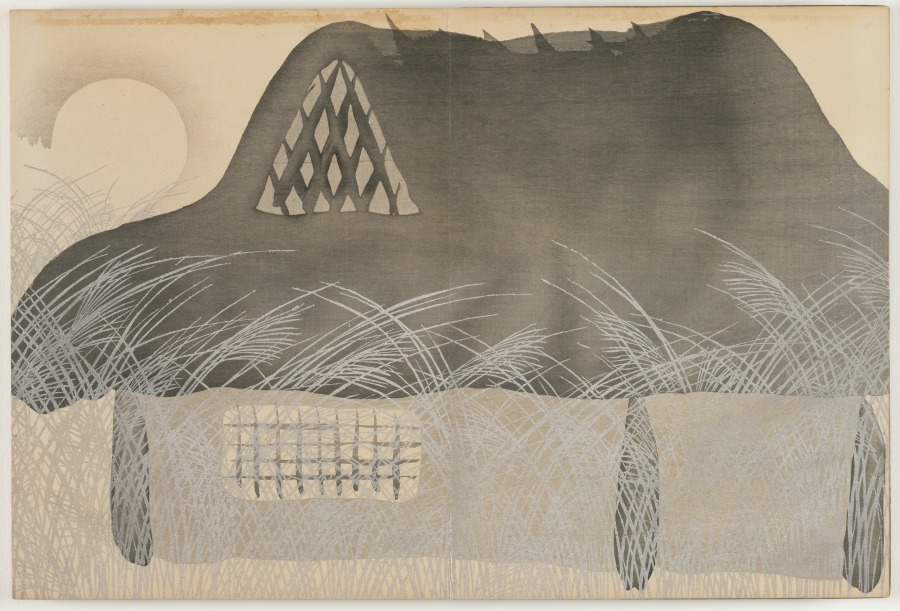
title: Flowers of a Hundred Worlds (Momoyogusa): Autumn Night (Aki no yoru)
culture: Japan, Meiji period (1868–1912)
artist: Kamisaka Sekka (Japanese, 1866–1942)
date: 1909–10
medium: color woodcuts with gold and silver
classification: Bound Volume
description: This print from a set of three woodblock printed albums displays the graphic design prowess of Kamisaka Sekka. The images were first distributed one by one to subscribers to the series but later were reissued in bound form, like this book, for mass consumers. Each print features a vignette taken from nature or Japanese literature. Many of the scenes have a long history in Japan, originating in the 900s or 1000s and having been interpreted by all manner of artists since that time. Sekka’s selections hew closely to precedents from the Rinpa style originated by painter Tawaraya Sōtatsu (c. 1570–c. 1640) and calligrapher Hon’ami Kōetsu (1558–1637).